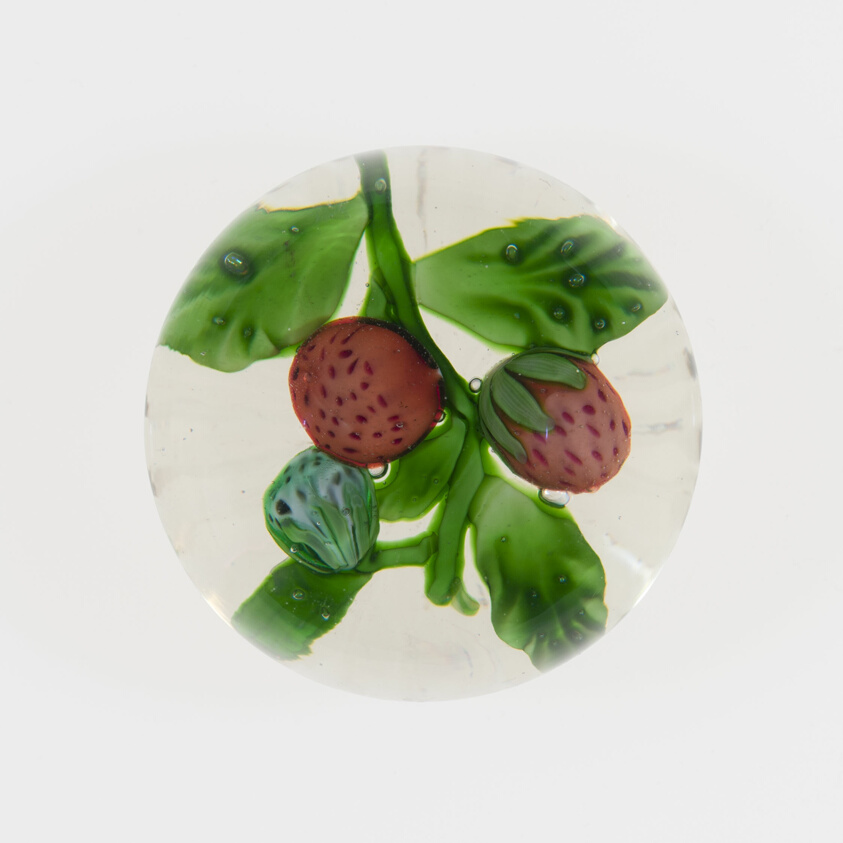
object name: Glass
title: Paperweight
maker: Baccarat Glassworks (Cristalleries de Baccarat); Lorraine, France, founded 1764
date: 19th century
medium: Glass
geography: France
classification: paperweight; glass